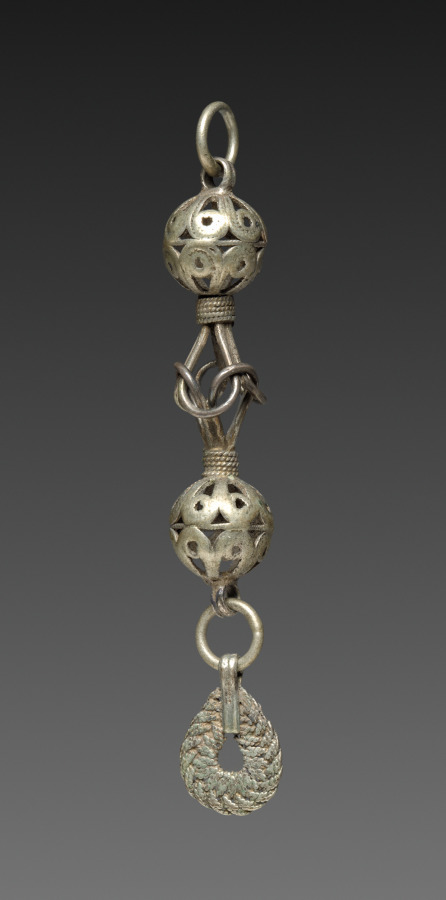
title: Button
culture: Balkans(?), 19th century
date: 1800s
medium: silver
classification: Jewelry